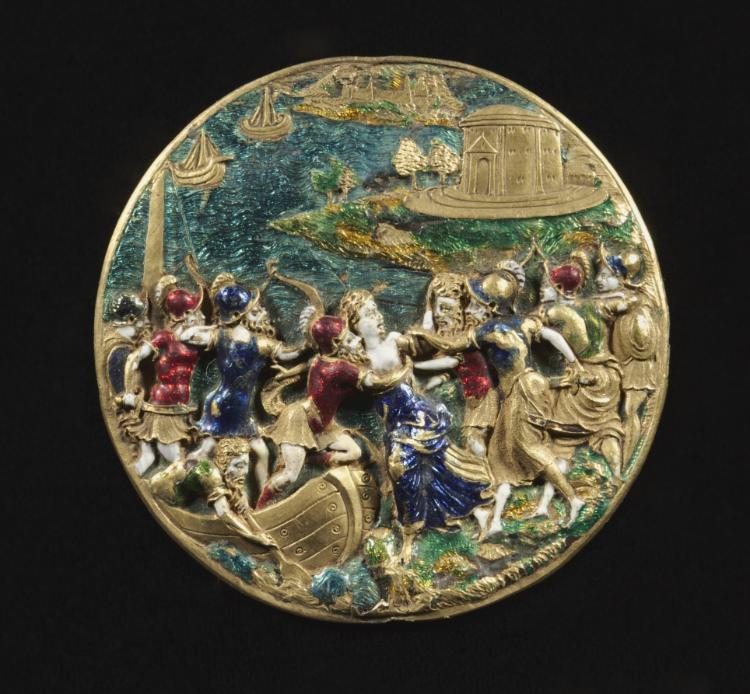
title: Hat Jewel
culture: France, mid-16th century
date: mid 1500s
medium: enameled gold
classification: Jewelry